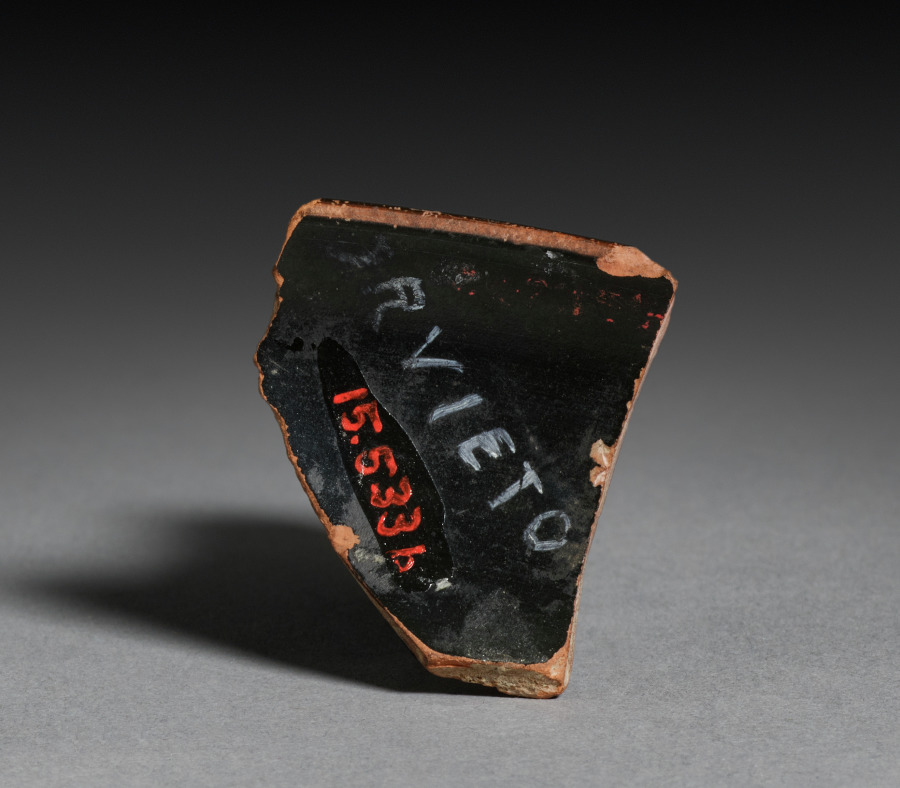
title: Fragment from Red-Figure Cup: Woman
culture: Greek, Attic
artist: near the Telephos Painter (Greek, Attic, active 480–460 BC)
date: c. 470–460 BCE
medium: ceramic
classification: Ceramic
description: A bit of preserved lip shows that this fragment comes from a kylix, or drinking cup. A finely dressed woman, with earring and headband, reaches out with her right hand, now lost but once holding a wreath in added red paint. Relief lines standing above the surface outline the face, neck, arm, and other details.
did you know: Painted on the back side of this fragment is ORVIETO, its likely findspot more than a century ago.